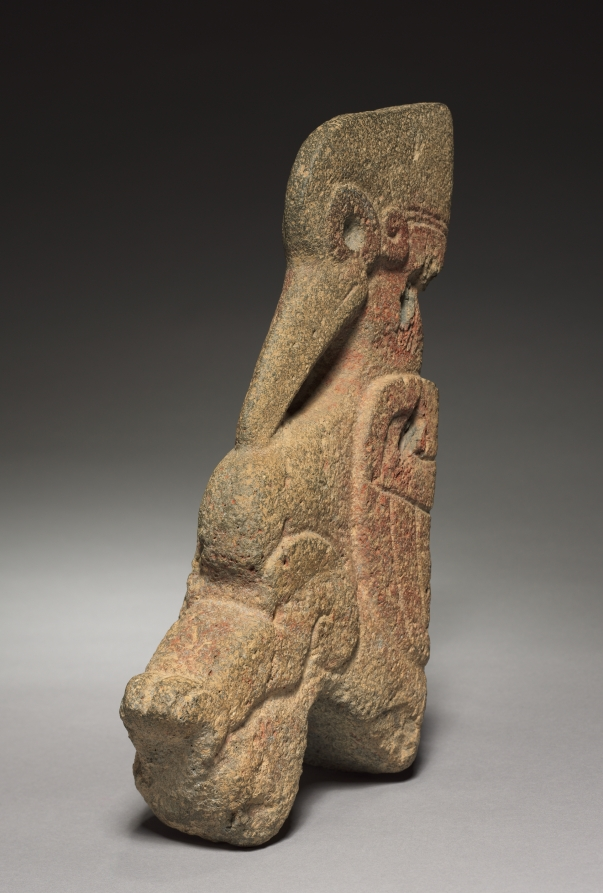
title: Bird Hacha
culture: Mexico, Veracruz, El Tajín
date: 300–900 CE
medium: gray volcanic stone with red pigment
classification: Sculpture